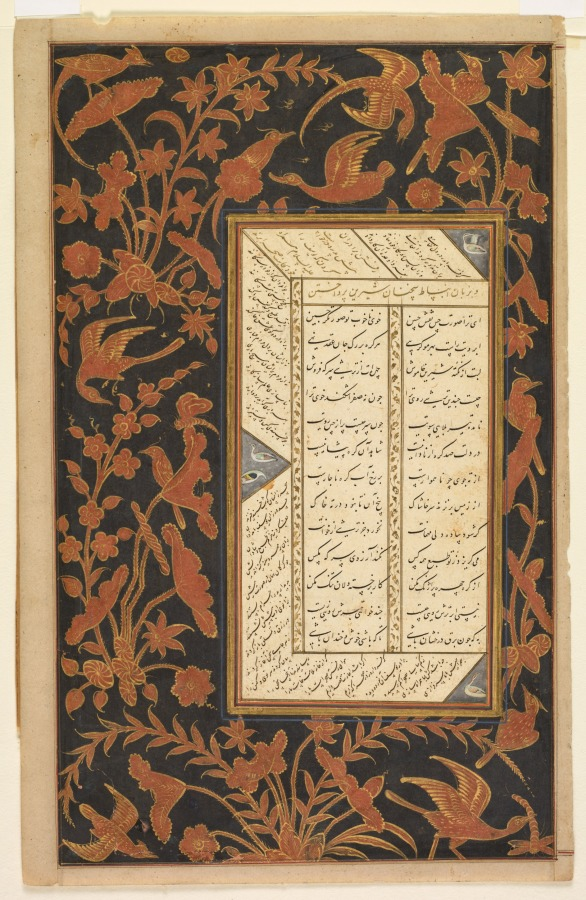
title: Folio B: Folio from the "Five Treasures" (Panj Ganj) of Jami (recto)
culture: Northern India, Mughal, early 17th century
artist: Mushfiq (Indian, active early 1600s)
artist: and others (Indian)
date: 1520–1607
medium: Gum tempera, ink, and gold on paper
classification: Painting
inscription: The miniature signed at upper left: ' amal - i Mushfiq sana 1015 (the work of the Mushfiq year 1015) Text on verso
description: This page contains two different texts, one written diagonally in the border and the other in the two central columns. The section of poetry in the border describes an episode from Joseph’s childhood in which his older brothers suggest to Jacob, their father, that they take Joseph into the countryside so that the boy can learn the area, although they actually plan to kill him. The poem in the central columns advises the reader to smile often, as a smile is sweeter and more pleasing than sugar.